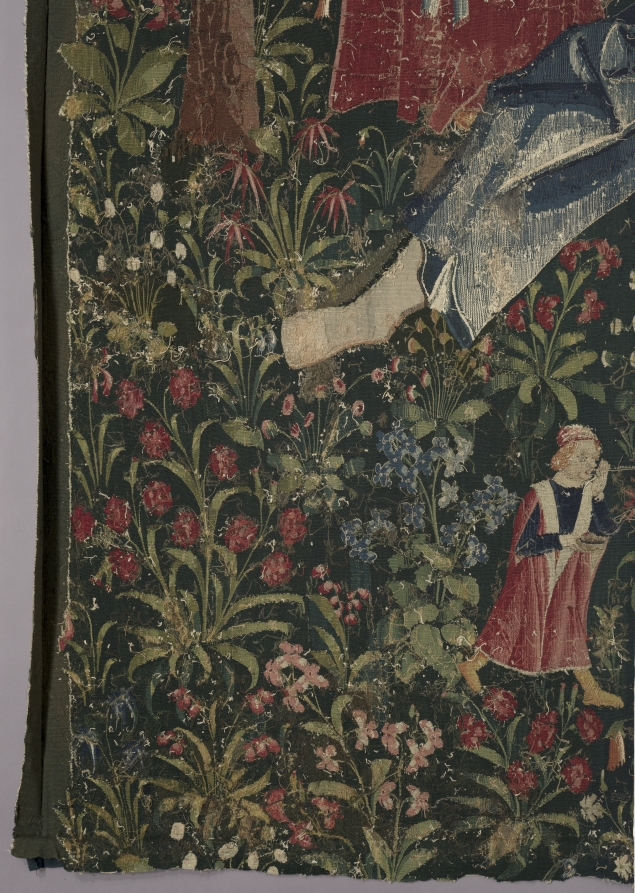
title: Youth (from Chateau de Chaumont set)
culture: France, Lyon(?), early 16th century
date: 1512–15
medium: silk and wool; tapestry weave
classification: Tapestry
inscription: French verse in Gothic letters translates as follows: Youth triumphs while its heart is healthy, And when it seems to hold all in its hand. But this triumph is without eternity. Here one sees the example full well: Those who are happy hide death in thier heart. Let the young heed this warning.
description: Louise of Savoy (1476-1531), queen mother of King Francis I, is depicted here in a sumptuous brocaded velvet in the center. She addresses youthful figures including Éléonore, Pierre Sala’s daughter who is facing her future husband, Hector. On the right, King Louis XII (died 1514) stands in front of the Chateau Langais where he had married Anne of Brittany. Above is Hector’s deceased father with a partially concealed skull under his robe, while a woman expresses surprise at the sight. The verse in Old French at the top states that youthful happiness is not eternal: Youth makes sounds as long as its heart is healthy, And thinks that it holds all in its hand. But this triumph is not eternal. Here you see clearly an example: He that is happy has death in his breast. Of this you people should take note.